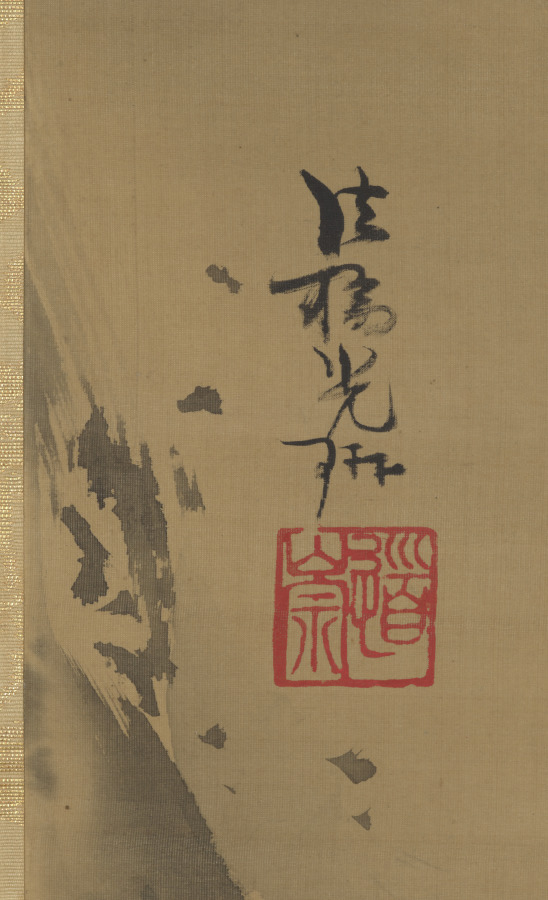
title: Plum Tree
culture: Japan, Edo period (1615–1868)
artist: Ogata Kōrin (Japanese, 1658–1716)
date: c. 1700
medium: hanging scroll; ink on silk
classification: Painting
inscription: Artist's signature and seal above hillock bottom right corner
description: Ogata Kōrin had to think through his design carefully to create these white plum blossoms and deliver their effect, as he used the reserve technique—where selected areas of the painting surface are left unpainted—to achieve it. He probably roughed in the tree before applying an ink wash to the entire silk surface, except where he intended to place the flowers. He likely then returned to articulate the petals and, in some cases, the pistils and stamens. The composition shows the tree twisting out of view, only to return with a branch of new growth jabbing forth from an old, broken limb, thereby heightening the visual impact of the blossoms.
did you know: The Rinpa style of painting is named for Ogata Kōrin, even though he did not create it.